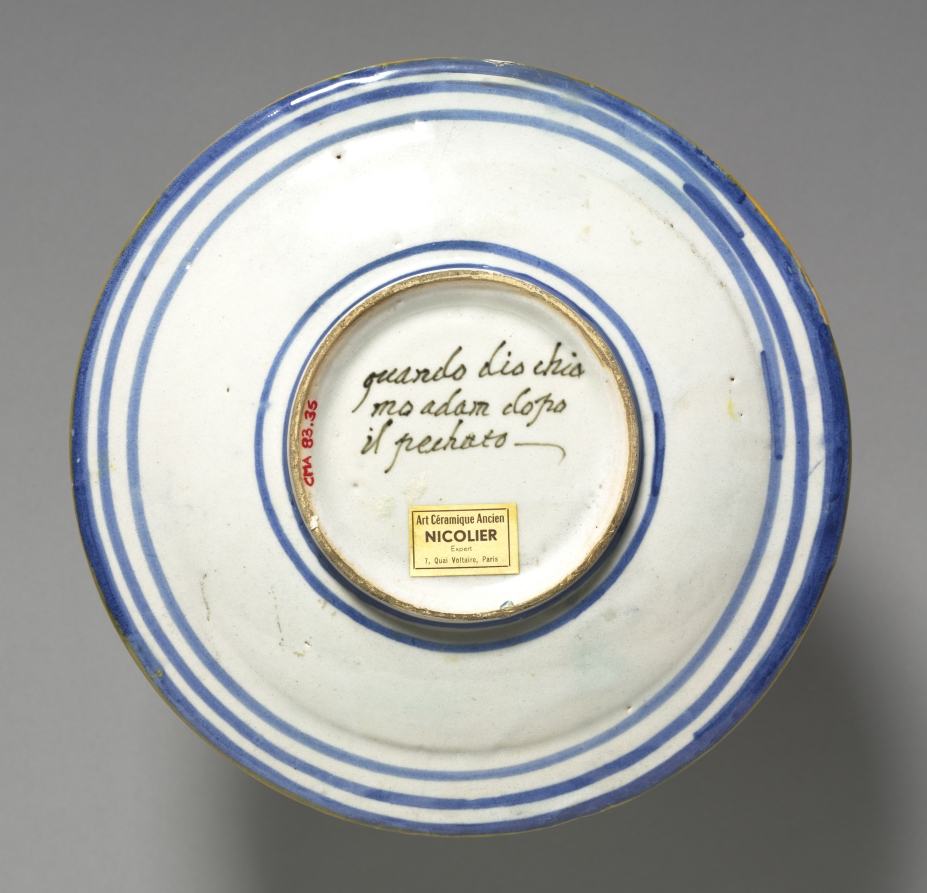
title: Dish Depicting the Expulsion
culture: France, Lyon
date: late 1500s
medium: tin-glazed earthenware (maiolica)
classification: Ceramic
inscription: inscribed on reverse: "guardo dio chiamo adam dopo il pechato."